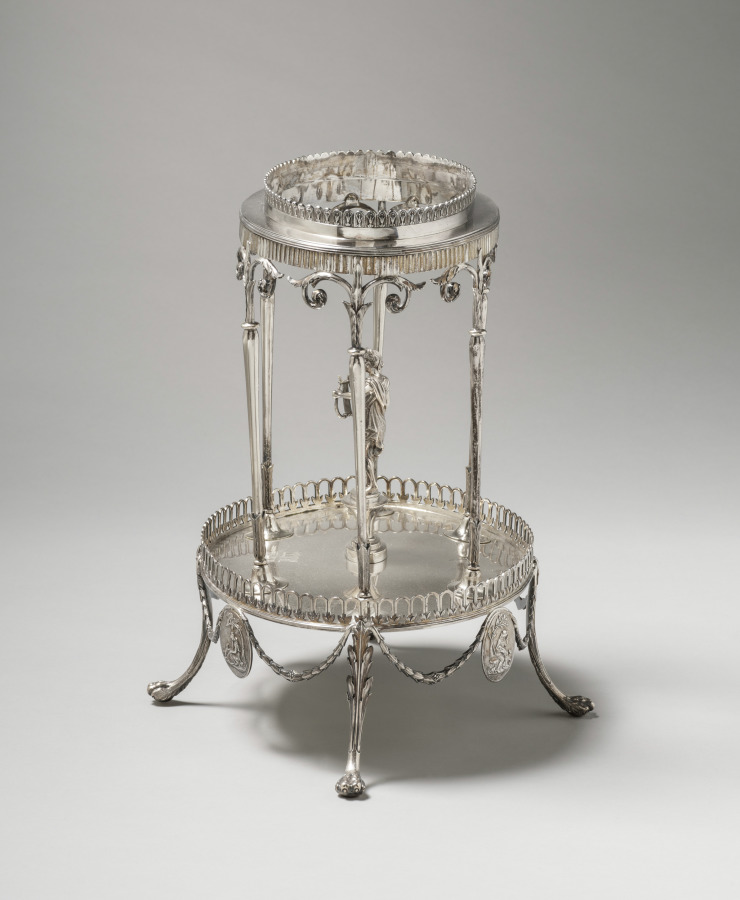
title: Centerpiece (metal stand)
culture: England, 18th century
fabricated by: William Pitts (British)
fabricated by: Joseph Preedy (British)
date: 1792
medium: silver and glass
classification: Silver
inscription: engraved: arms and crest of Bell Coat of arms with Bell impaling Brandling on flat platform.